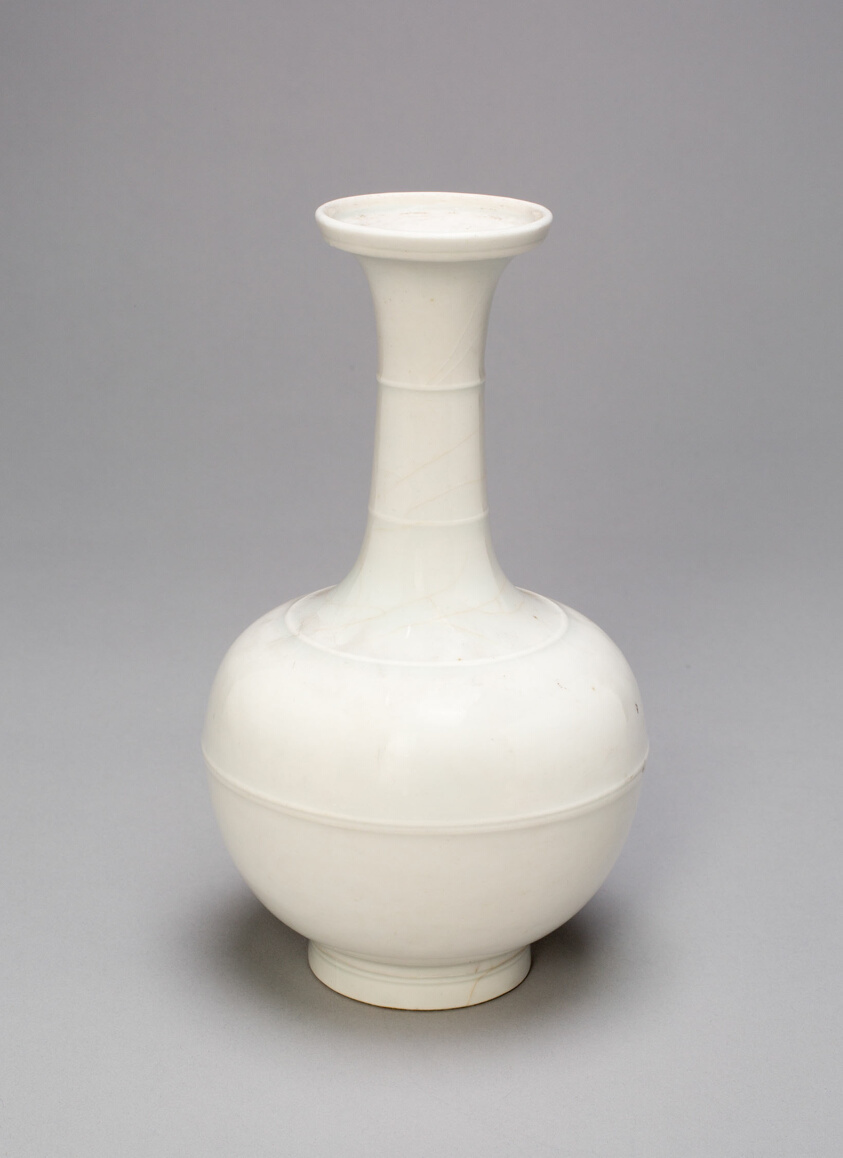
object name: Vessel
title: Bottle-Shaped Vase with Encircling Ribs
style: Chinese (culture or style)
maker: China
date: Ming dynasty (1368–1644) or Qing dynasty (1644–1911), c. late 17th/18th century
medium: Dehua ware (blanc de chine); porcelain with underglaze thread relief decoration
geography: China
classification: vase; porcelain; vessel; asian art; ceramics